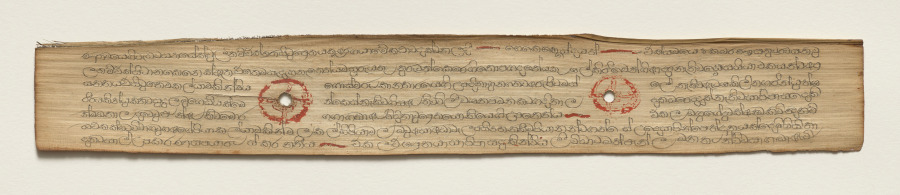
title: Leaf from a Buddhist Manuscript (verso)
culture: Sri Lanka, Singhalese, Late 17th century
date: c. 1700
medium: fiber paper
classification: Manuscript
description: Palm leaf material is still used for manuscripts in Sri Lanka. The palm leaves are prepared first by boiling them, drying them in the sun, and then rubbing them with oils. Scribes then use a metal stylus to incise the text. Then charcoal powder is wiped across the pages, filling in only the inscribed lines.